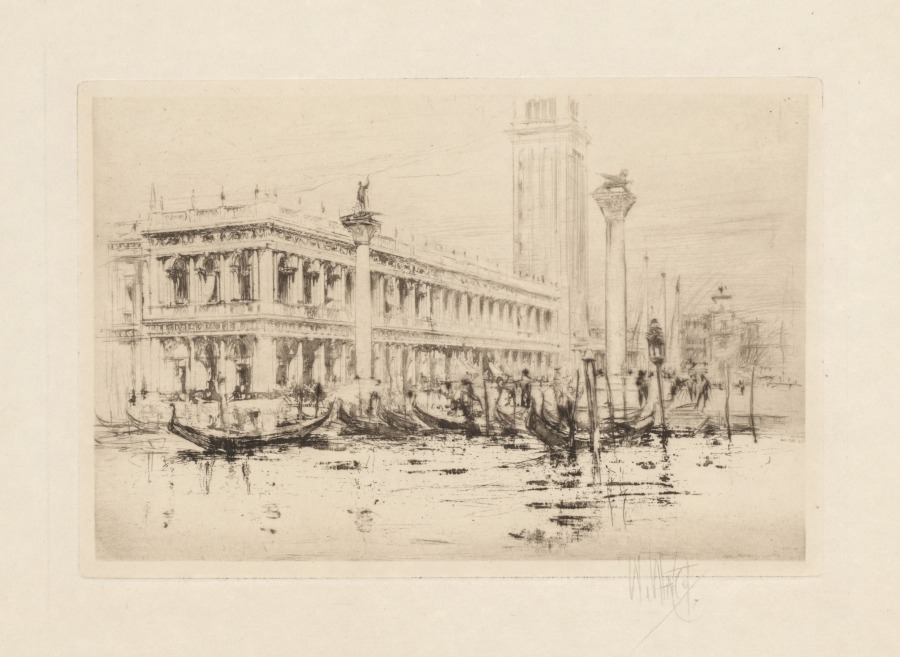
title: The Venice Set: The Library of St. Mark’s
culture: Britain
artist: William Walcot (British, 1874–1943)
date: 1920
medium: Etching, drypoint, and aquatint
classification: Print